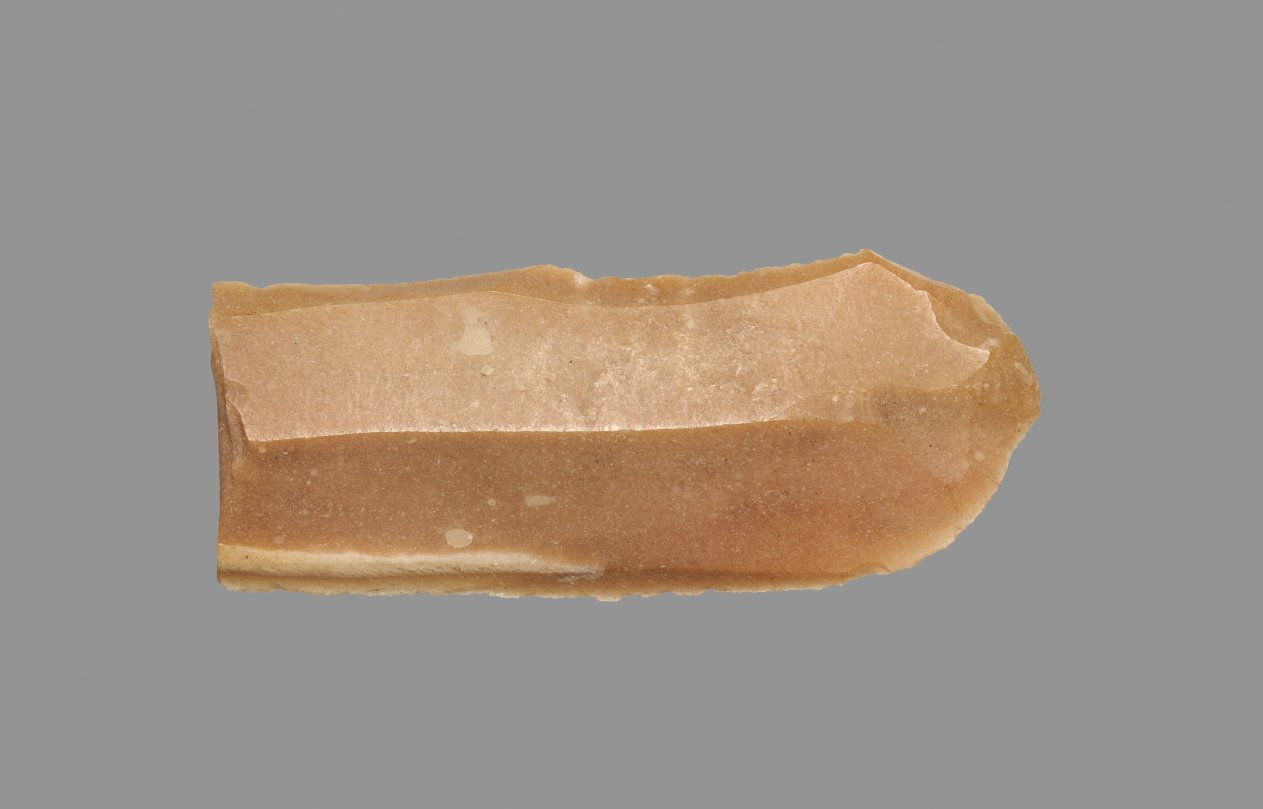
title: Sickle Blade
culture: Egypt, Middle Kingdom (2040–1648 BCE), Dynasty 12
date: 1980–1801 BCE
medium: flint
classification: Implements